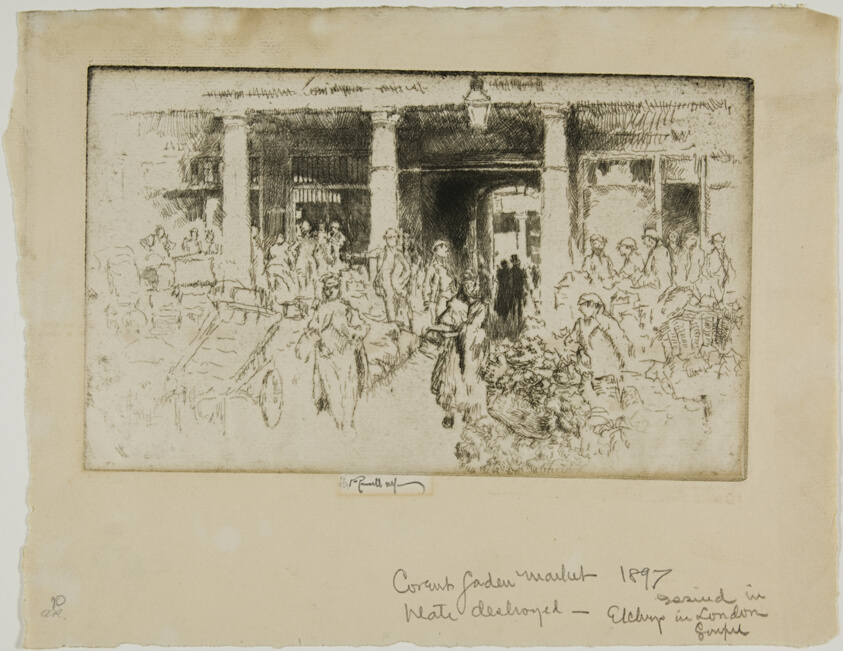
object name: Print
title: Covent Garden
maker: Joseph Pennell (American, 1857-1926)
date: 1887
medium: Etching on ivory laid paper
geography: United States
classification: etching; print; prints and drawing